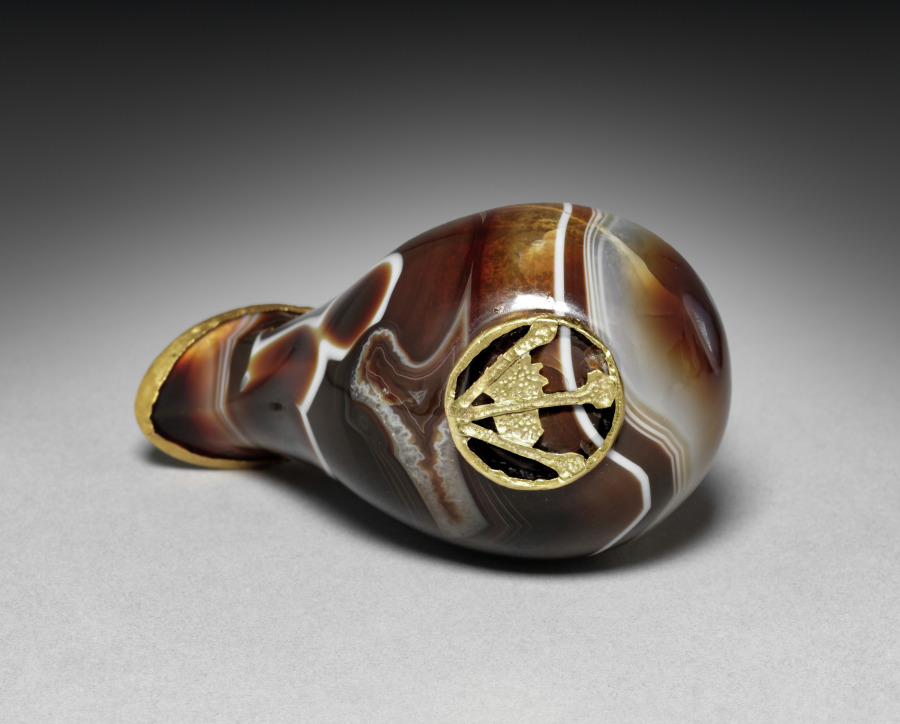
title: Askos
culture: Greece, Ptolemaic Dynasty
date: 200–1 BCE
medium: agate and gold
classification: Cosmetic Objects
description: This miniature vessel was carved from a single piece of banded agate, polished to a shine, and embellished with a gold lid and gold details on the base. Inside the ring of gold at the base is a trio of gold papyrus stalks, a likely reference to Egypt. In shape, it resembles an ancient wineskin, or askos, though its small size suggests use for luxury perfumes or oils. A tiny crab, likely once inlaid with a precious material, has been carved behind the handle.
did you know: The knob on the lid connects to a hidden disk to control the flow of liquid.